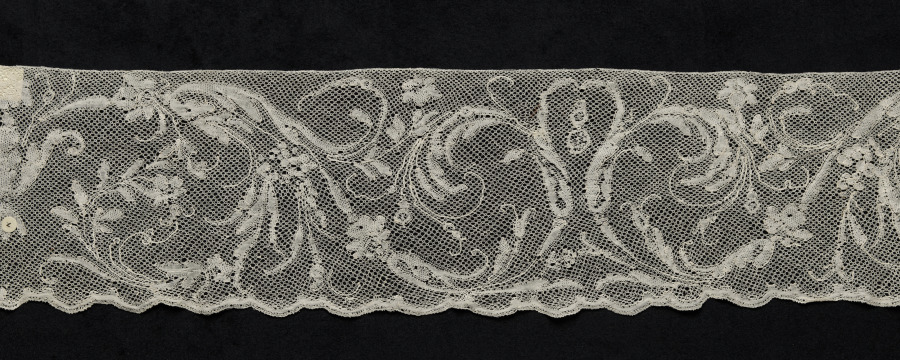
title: Lace Edging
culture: France, Normandy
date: 1700s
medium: Linen: bobbin lace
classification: Lace